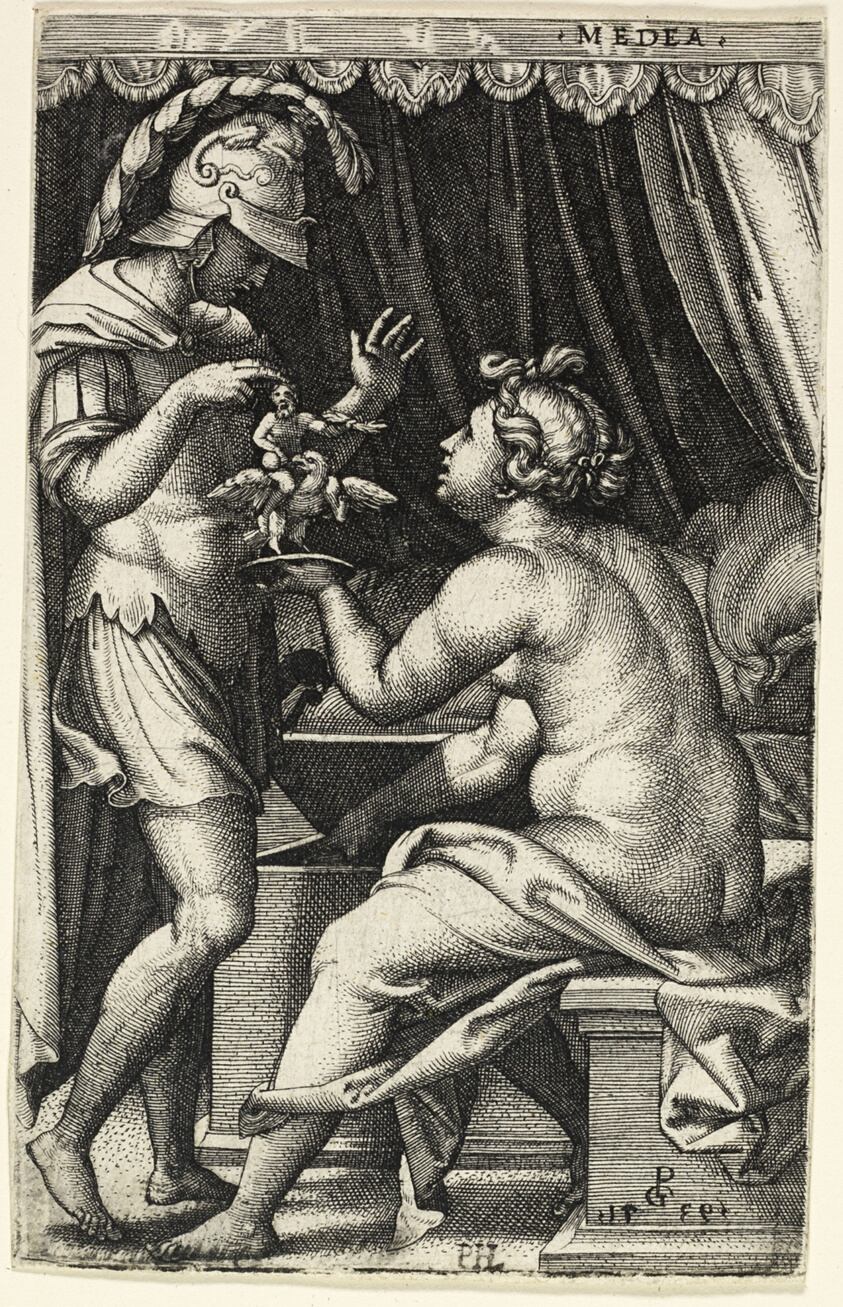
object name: Print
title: Medea and Jason, from Greek Heroines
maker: Georg Pencz (German, c. 1500-1550)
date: 1539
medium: Engraving in black on paper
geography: Germany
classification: engraving; print; prints and drawing